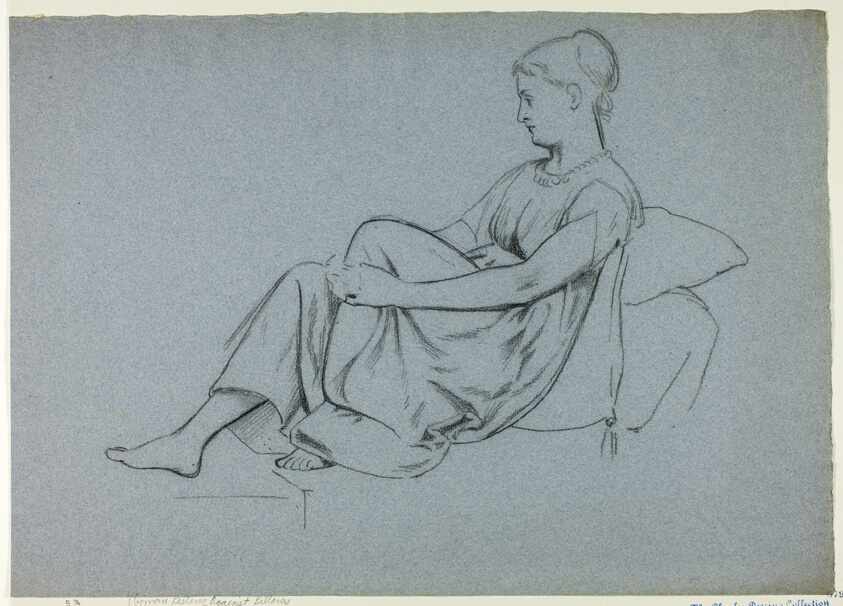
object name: Drawing and Watercolor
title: Woman Resting Against Pillows Clasping Her Knee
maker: Henry Stacy Marks (English, 1829-1898)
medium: Black pastel on blue laid paper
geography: England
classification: pastel; drawings (visual works); prints and drawing